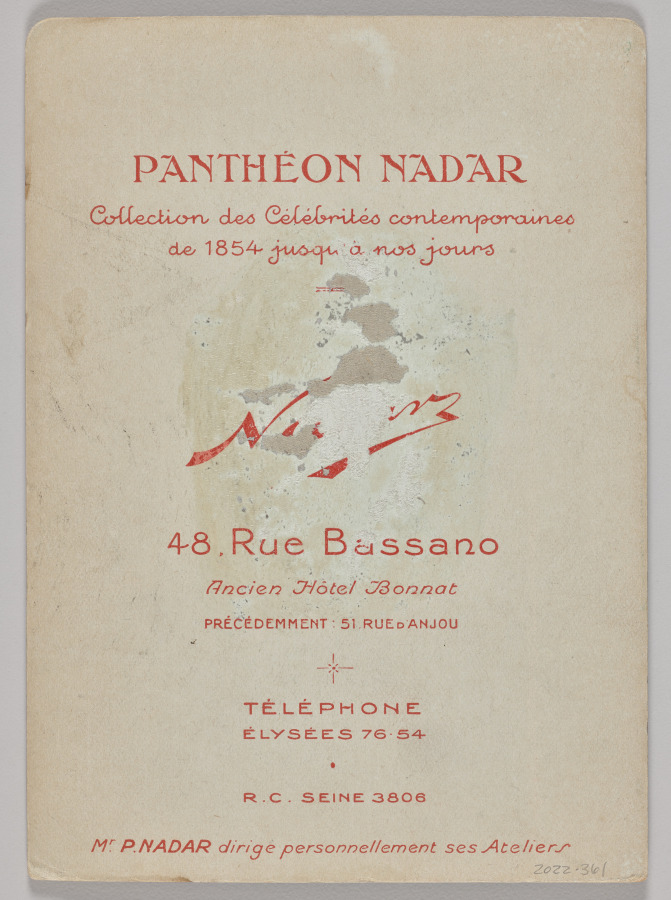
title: Gérard de Nerval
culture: France, 19th century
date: 1850s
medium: albumen print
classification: Photograph